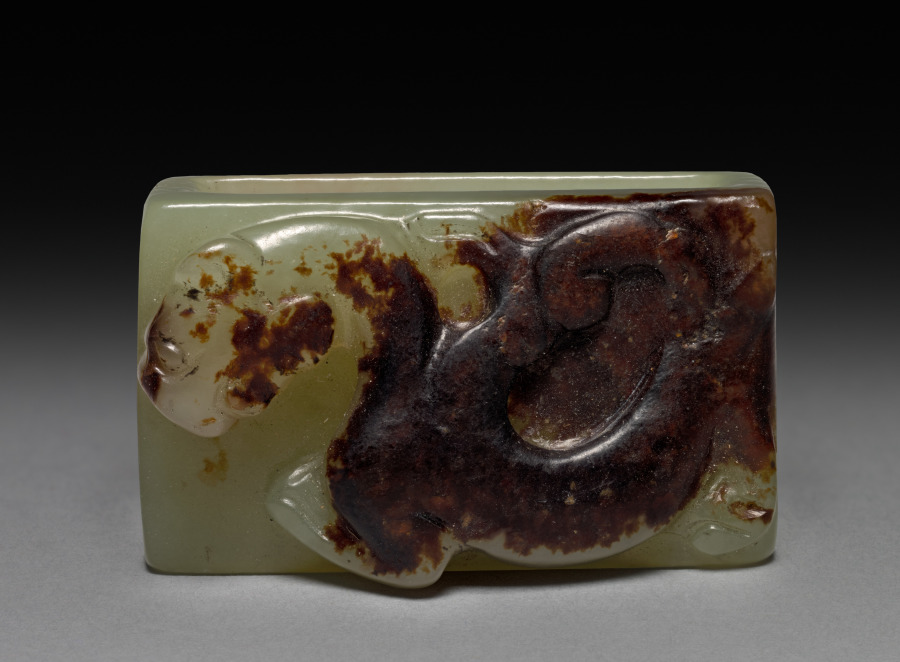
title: Scabbard Fitting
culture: China, Six Dynasties period (220–589 CE)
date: 317–581 CE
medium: jade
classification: Jade